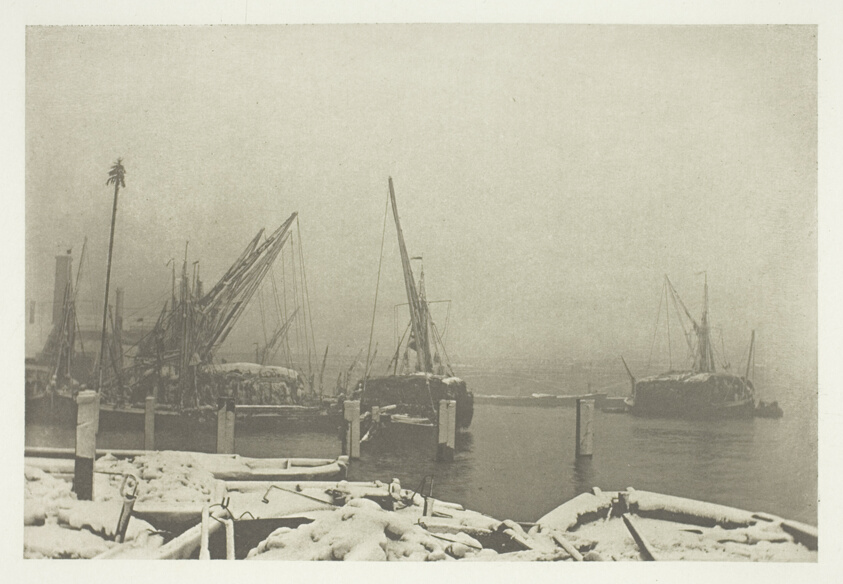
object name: Photograph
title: A Foggy Day on the Thames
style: 19th century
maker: Mr. J. Gale (English, died 1906)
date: c. 1889, printed October 1889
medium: Photogravure, from "Sun Artists, Number 1" (1889)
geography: England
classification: photogravure; photomechanical process; photography; photograph